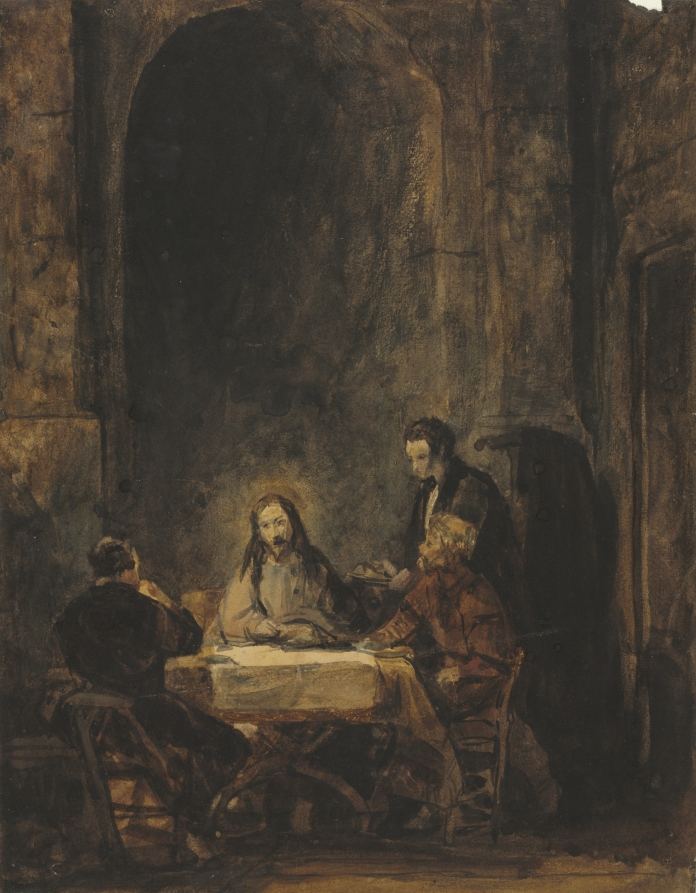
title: Christ at Emmaus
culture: America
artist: attributed to Benjamin West (American, 1738–1820)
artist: after Rembrandt van Rijn (Dutch, 1606–1669)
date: c. 1760–1820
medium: watercolor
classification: Drawing